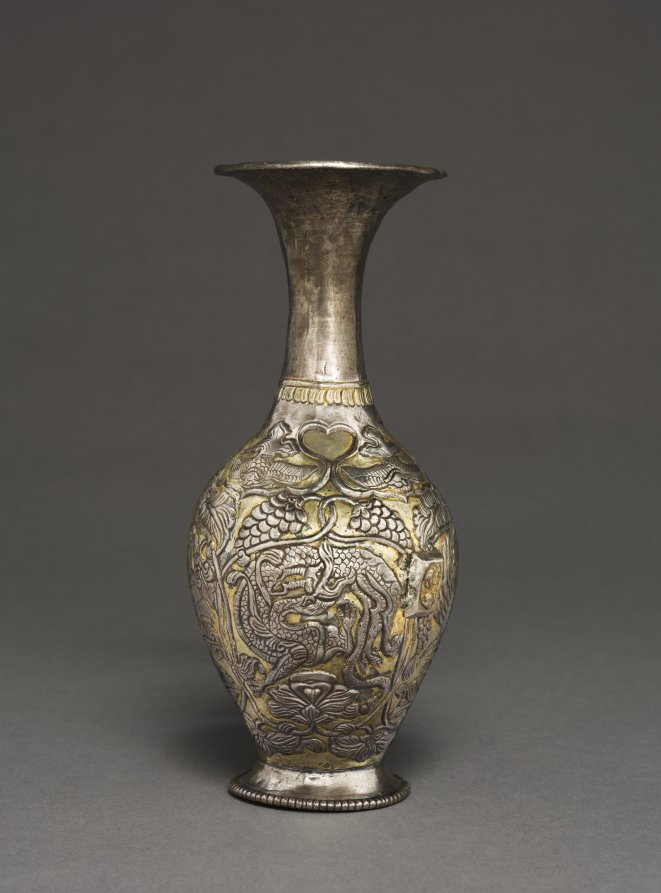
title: Vase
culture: Central Asia (Sogdiana) or Tibet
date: c. late 600s–early 700s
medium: silver with gilded foil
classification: Silver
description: Located amid the vast “silk roads” trade network, medieval Tibet was a place of dynamic cultural exchange. This decanter is evidence of such interactions. The vessel is part of the tableware used to hold wine during feasts. Tibetan elites adopted the tradition of consuming wine at social gatherings from their Iranian (Persian) contemporaries, whose wine banquets were lavish affairs with plentiful food and drink.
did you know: Lions were often seen as powerful protectors while phoenixes were associated with good fortune.